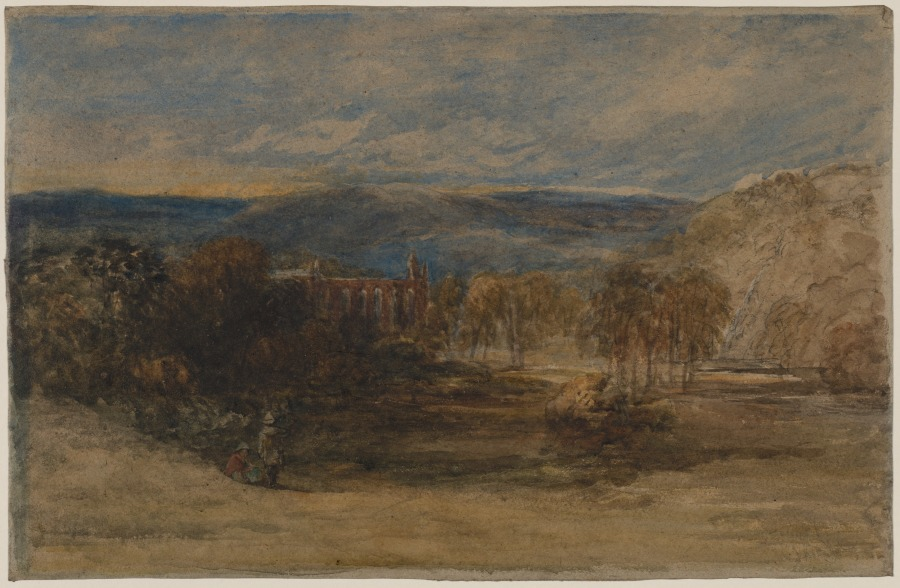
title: Bolton Abbey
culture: England, 19th century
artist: David Cox (British, 1783–1859)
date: c. late 1840s-1857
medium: watercolor with black chalk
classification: Drawing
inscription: inscribed, at lower right, in graphite: WSE; in white chalk on wood backing: June 8-03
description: This moody, broadly painted watercolor on rough, brown paper is emblematic of David Cox’s late style. Velvety grays and greens throughout the composition shift almost imperceptibly and streaks of blue wash, describing the distant hills and sky, are pierced by a sliver of brilliant yellow at the horizon. The ruined 12th-century priory is relegated to the background, nearly lost in the twilight.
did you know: The neighborhood where Bolton Abbey was found was one of David Cox's favorite places to paint and the church appeared as a subject throughout his works from about 1828 through 1857.